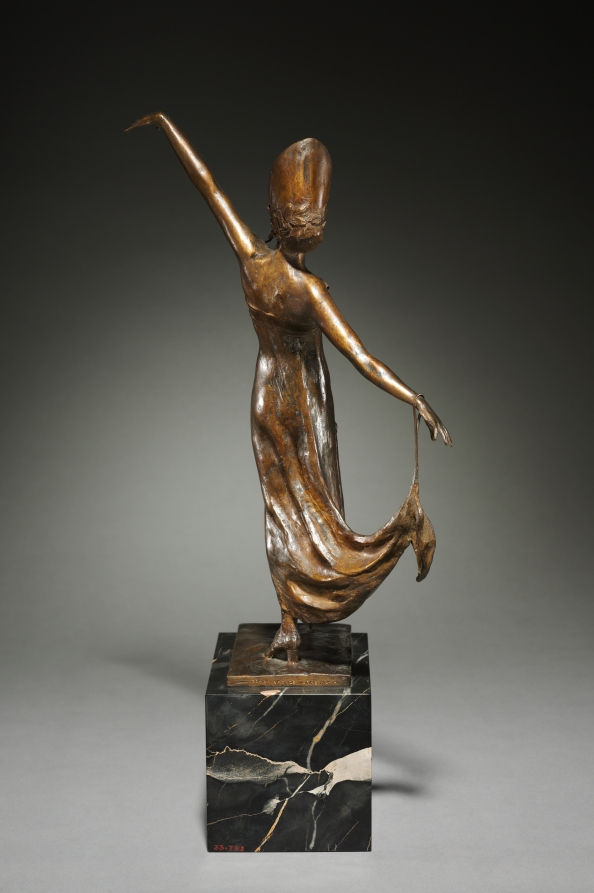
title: Pavlova Dancing the Gavotte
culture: America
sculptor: Malvina Hoffman (American, 1887–1966)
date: 1915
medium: bronze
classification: Sculpture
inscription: Signed on base: "Malvina Hoffman 1915, IX ©"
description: Sculptor Malvina Hoffman met the acclaimed Russian ballerina Ana Pavlova in New York during the spring of 1914. This bronze rendering of the dancer, posed with broadly outstretched arms, was created the following year. At the time, Pavlova was attempting to popularize a Russian version of the French folk dance known as the gavotte.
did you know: A pavlova is a meringue-based dessert inspired by the shape of ballerina Anna Pavlova's tutu.